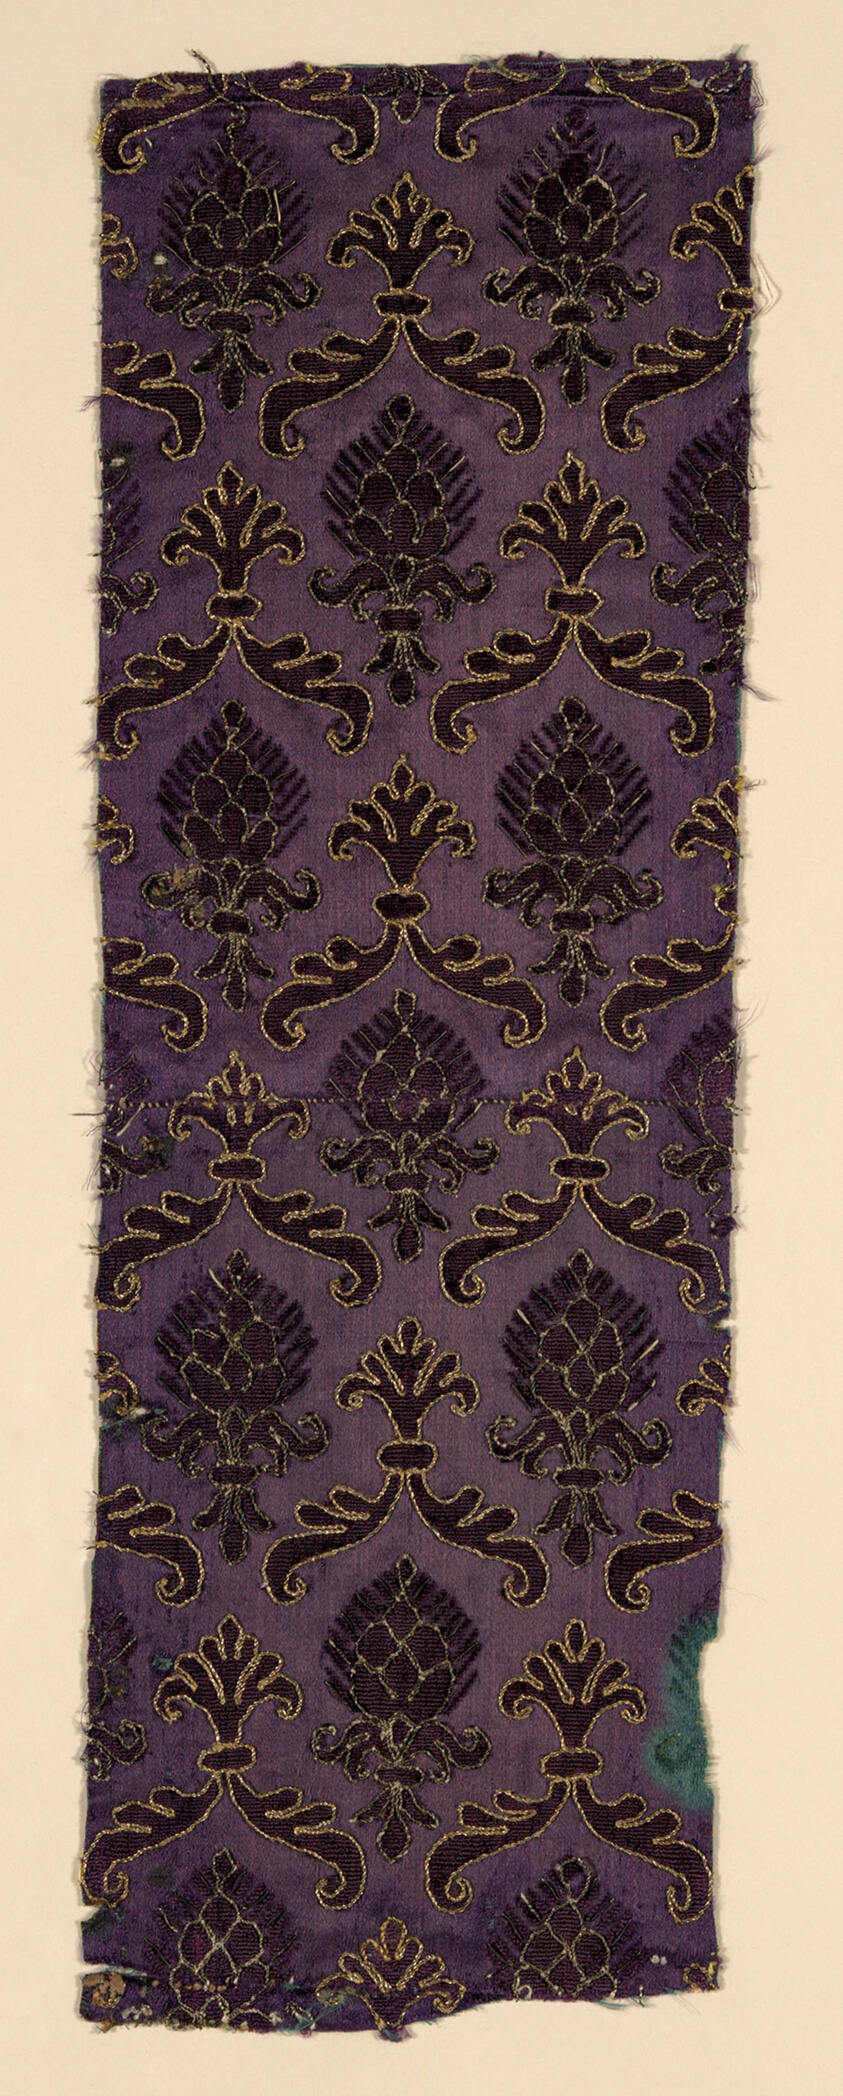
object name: Textile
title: Fragment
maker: Italy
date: 1575/1600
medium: Silk, warp-float faced satin weave with supplementary pile warps forming uncut and voided velvet; outlined by gilt-metal-strip-wrapped silk in running and couching stitches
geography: Italy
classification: textile; weaving - velvet